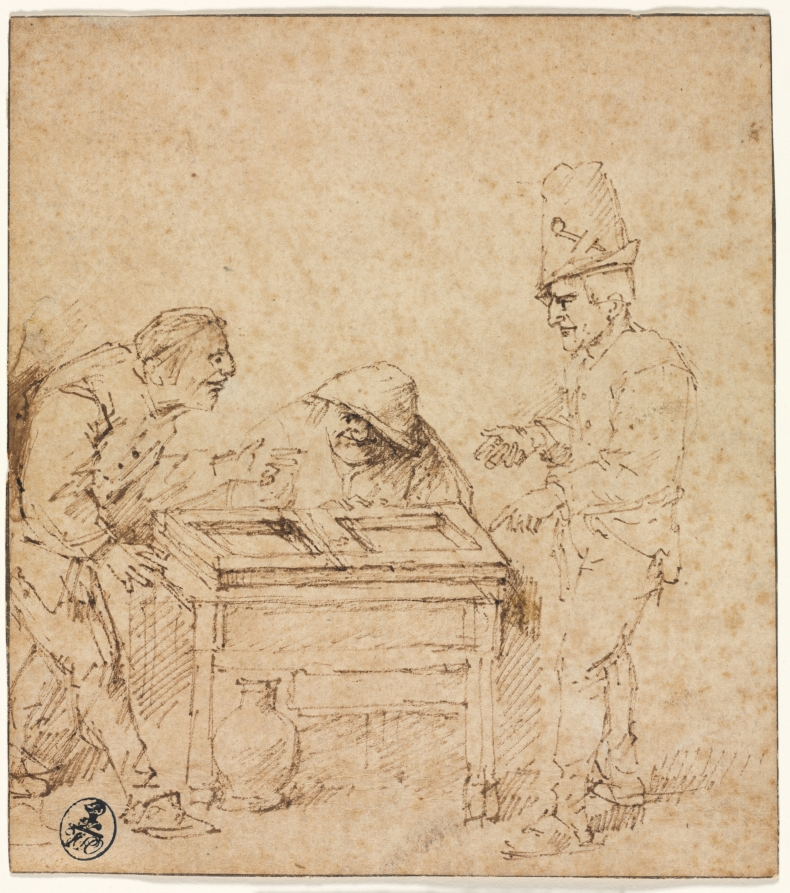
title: The Tric-Trac Players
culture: Netherlands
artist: Philips de Koninck (Dutch, 1619–1688)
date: c. 1660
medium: reed pen and brown ink (with brush and brown wash behind left figure); framing lines in brown ink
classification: Drawing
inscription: VERSO, center, in graphite: [6 3/8?, patially erased, upside down] ; lower left, in graphite: [illegible, erased] ; lower center, in graphite: [Philips de Koninck?, erased] ; lower right, in graphite: [illegible, erased]